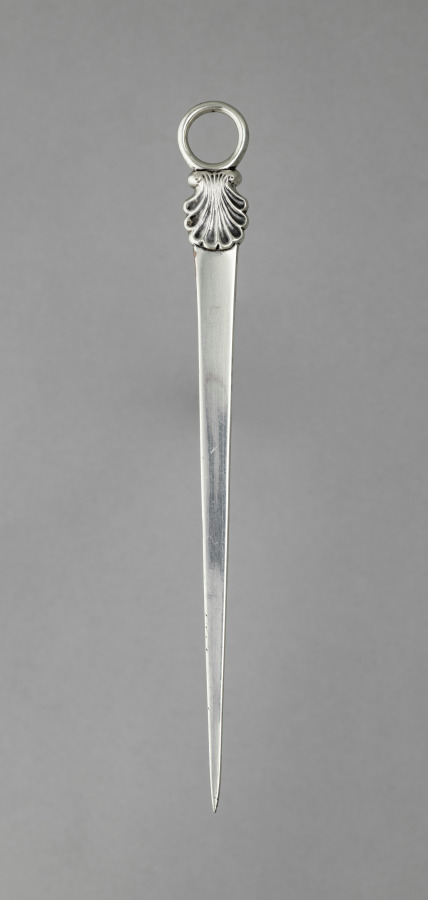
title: Skewer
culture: England, 18th century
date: c. 1760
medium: silver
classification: Silver